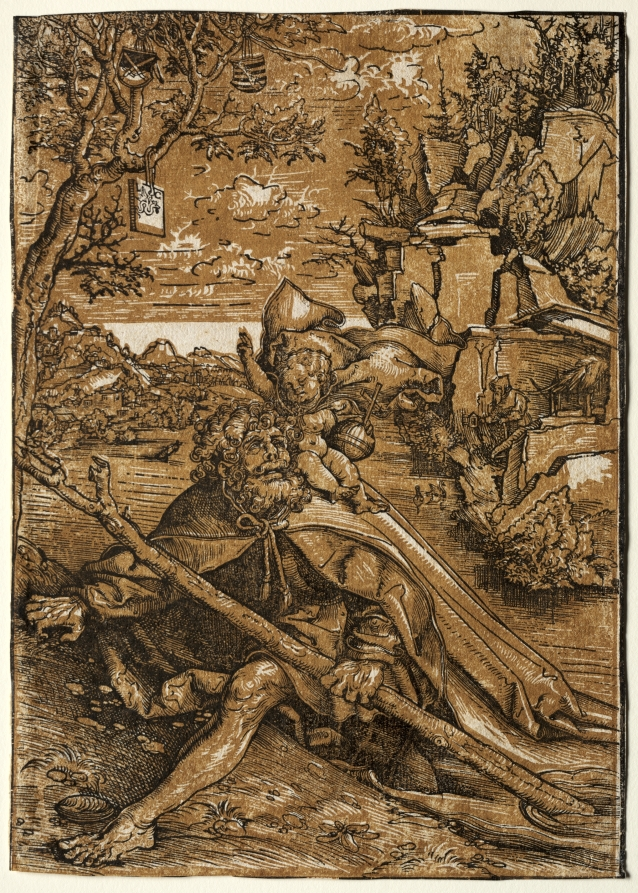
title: Saint Christopher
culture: Germany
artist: Lucas Cranach (German, 1472–1553)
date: c. 1509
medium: chiaroscuro woodcut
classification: Print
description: In Hans Burgkmair's Emperor Maximilian on Horseback, the black outline and white highlights are printed and the paper is washed blue. In Saint Christopher, however, while the black line block is still printed, color is now printed with a tone block and unprinted areas of the white paper act as highlights. Although Saint Christopher is dated 1506, it was probably made after 1508 when Cranach was granted permission by Duke Friedrich to use the coat of arms with a winged serpent seen hanging from the tree. Further, it was only after the artist returned from a trip to the Netherlands in 1508 that he probably would have learned about the use of a tone block by his rival Burgkmair. He then produced two woodcuts using tone blocks—Saint Christopher and Venus and Cupid—predating them to 1506 to claim the invention of chiaroscuro woodcuts for himself.